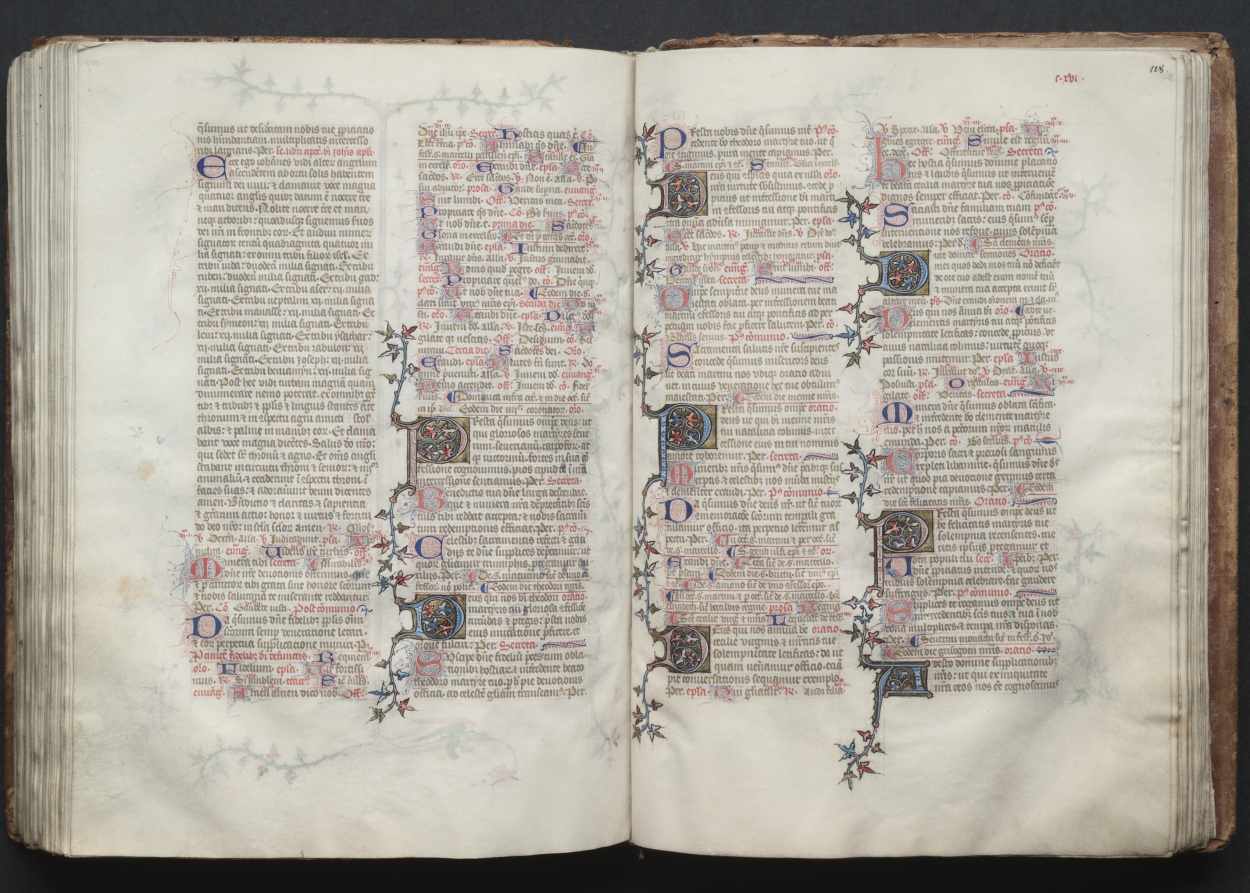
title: The Gotha Missal: Fol. 127v, Text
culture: France, Paris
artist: Master of the Boqueteaux (French)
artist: and Workshop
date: c. 1375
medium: ink, tempera, and gold on vellum; blind-tooled leather binding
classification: Bound Volume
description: The style and quality of this manuscript's decoration is typical of deluxe Parisian books made for aristocratic or royal patrons. Most of the book's decoration appears to be the work of the Master of the Boqueteaux, an artist active at the court of King Charles V (died 1380). His style was apparently shared by a number of book illuminators working in and around Paris. It is very possible that the Gotha Missal belonged to Charles V, but is not provable because the manuscript has no royal portraits and lacks a colophon. Given the book's magnificent decoration, however, it would seem that it was produced for a Valois prince, if not for the king himself. The manuscript receives its name from the German dukes of Gotha, its later owners.